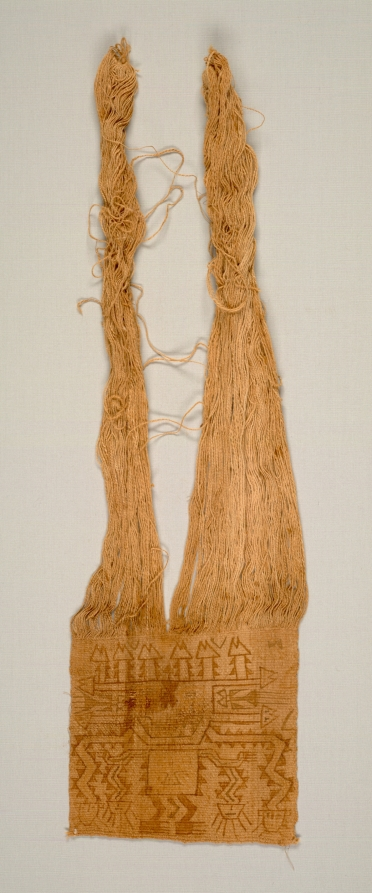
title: Mummy Bundle "Mask"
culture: Peru, South Coast, Ica Valley, Ocucaje site, Paracas style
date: 200 BCE–1 CE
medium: plain warp-faced cloth, painted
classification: Textile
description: The Paracas people buried their dead in pear-shaped mummy bundles, created by carefully wrapping the seated human body in layers of garments and other textiles. Sometimes a painted cloth was placed on the outer layer at the top of the bundle, as though it served as the bundle’s face, head, or “mask.” Some cloths were painted with masklike faces, although others—such as this example—feature complete figures, which may be mythological beings with supernatural appendages.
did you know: These masks fall into two categories, those with only a face and those with a full-bodied figure.